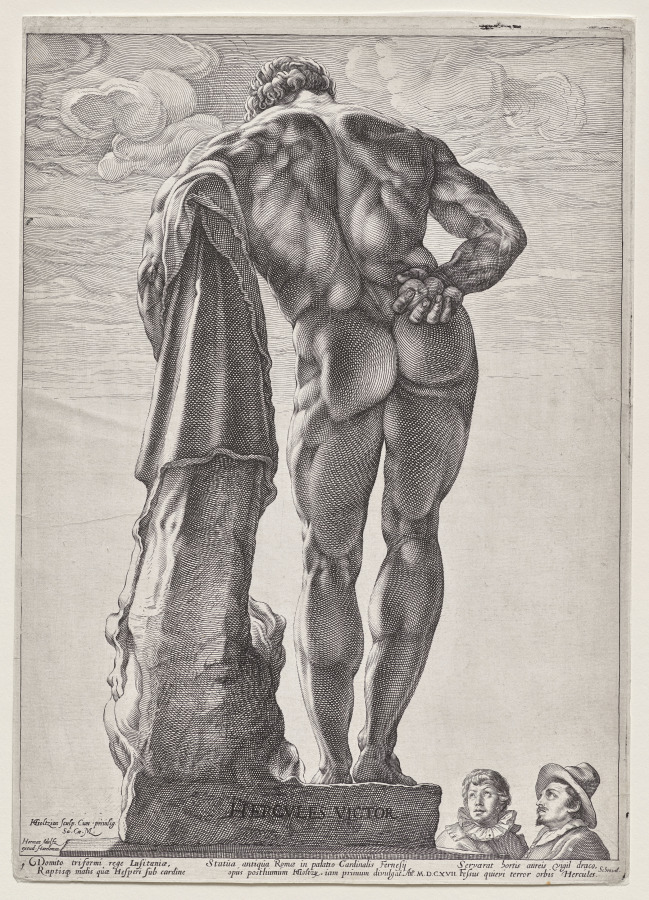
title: The Farnesian Hercules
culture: Netherlands, 16th century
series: Three Famous Antique Roman Statues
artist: Hendrick Goltzius (Dutch, 1558–1617)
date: 1592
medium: engraving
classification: Print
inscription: watermark: Strasbourg Lily and pendant letters WR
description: Hendrick Goltzius was one of many late Renaissance artists who felt compelled to travel to Italy as part of his artistic training. He went with one purpose—to study antique sculpture. Goltzius made drawings on-site and then made engravings after his designs once he returned to Haarlem in 1591. He portrayed the Farnese Hercules from a low viewpoint to capture the awesome experience of first encountering the famous monument. Goltzius showed the sculpture from behind and in shadow, emphasizing its glowing highlights. The print includes two observers, who were assumed by contemporary Dutch commentators to be a self-portrait of Goltzius with his stepson, Jacob Matham, who was also an engraver.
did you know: The 3rd-century Farnese Hercules was unearthed in 1546 in the Baths of Caracalla in Rome and was on display in the courtyard of the Farnese Palace by the time Hendrick Goltzius visited the city.